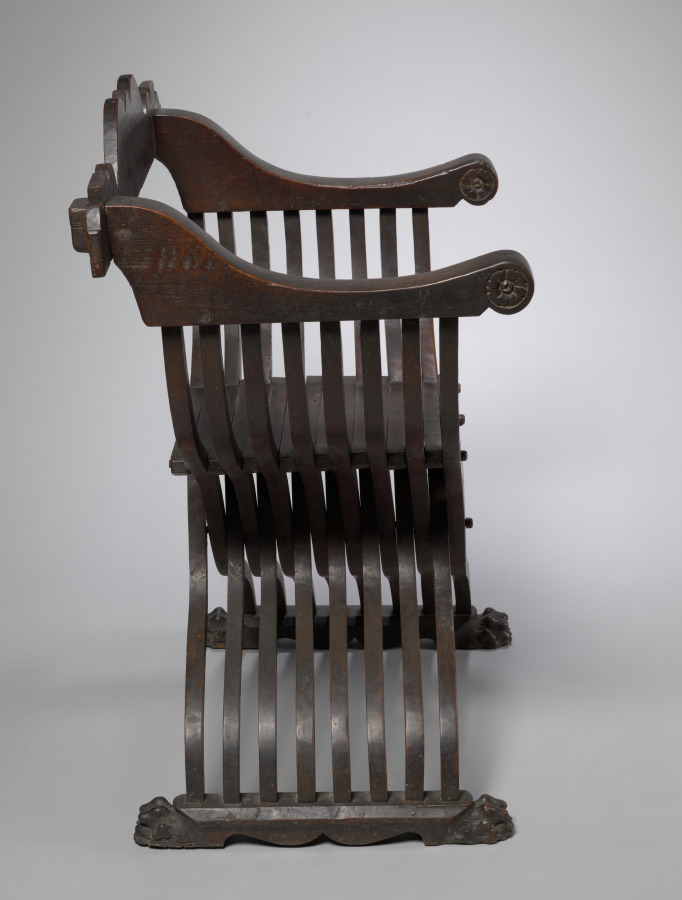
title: Folding Armchair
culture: Italy, early 16th century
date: early 1500s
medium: walnut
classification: Furniture and woodwork